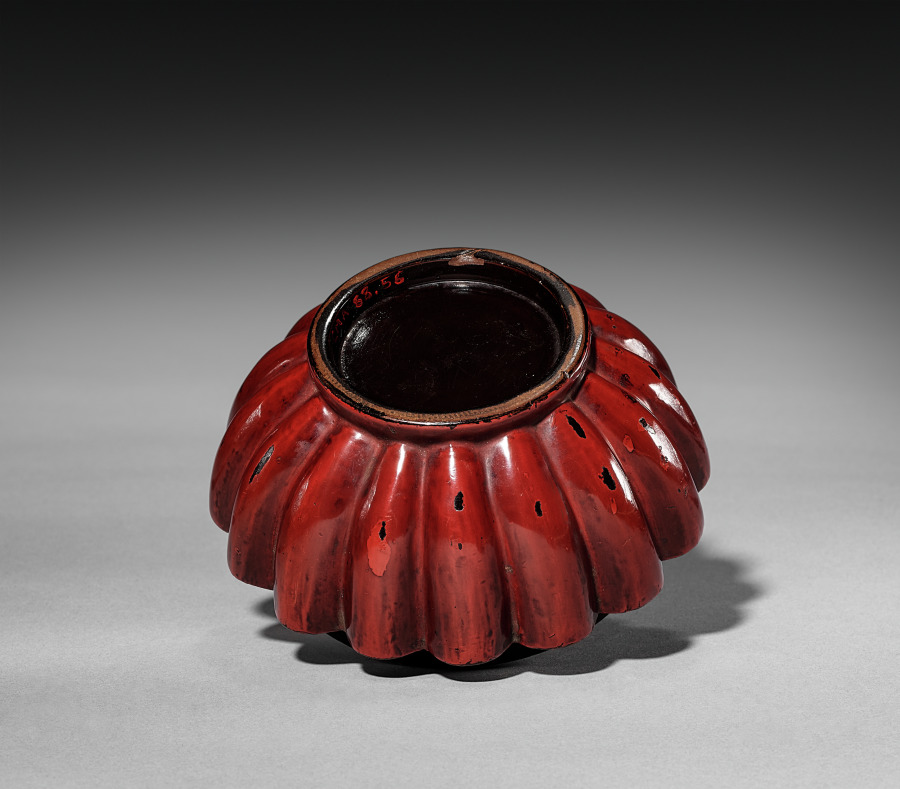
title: Tea Caddy (Chaire)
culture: Japan, Muromachi period (1392–1573)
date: 1500s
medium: Negoro lacquer on wood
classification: Lacquer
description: Negoro is a lacquer technique, named after the Negoro temple in Japan, in which several layers of red lacquer are applied over a black lacquer undercoating. Through years of handling, a natural surface of red and black random patterns emerges, an aesthetic highly prized by the Japanese.